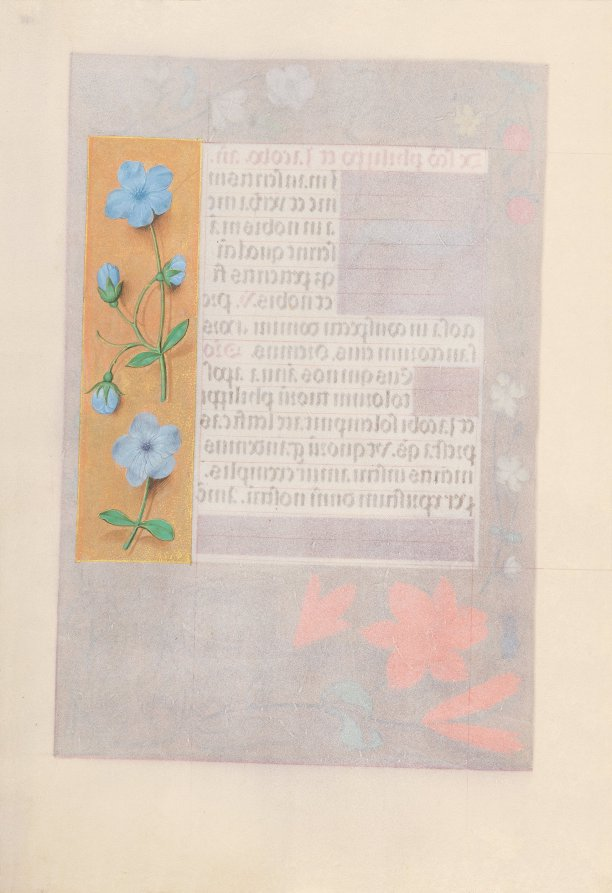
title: Hours of Queen Isabella the Catholic, Queen of Spain: Fol. 176v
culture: Flanders, Ghent and Bruges, late 15th century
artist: Master of the First Prayerbook of Maximillian (Flemish, c. 1444–1519)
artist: and Associates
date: c. 1500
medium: ink, tempera, and gold on vellum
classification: Bound Volume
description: This manuscript was illuminated by a circle of at least five highly organized manuscript painters active in the Flemish cities of Ghent and Bruges. The principal illuminator was Alexander Bening, who painted the majority of the book's miniatures. Manuscripts produced by this circle of artists are renowned for the decoration of their borders, which typically feature a rich variety of realistically-painted flowers, birds, and butterflies. This prayer book, called a book of hours, was intended not for a cleric, but for the private devotions of a lay person-in this case, Isabella the Catholic, Queen of Spain (1451-1504). Isabella's coat of arms embellishes the book's frontispiece. It is unlikely that the book was commissioned by the Queen herself; rather, she probably received it as a diplomatic gift from someone courting her patronage, perhaps Cardinal Francisco Jimenez de Cisneros. A Franciscan friar, Jimenez was dependent upon Isabella for his advancement, first to the post of Queen's confessor in 1492, and then to Archbishop of Toledo in 1495.